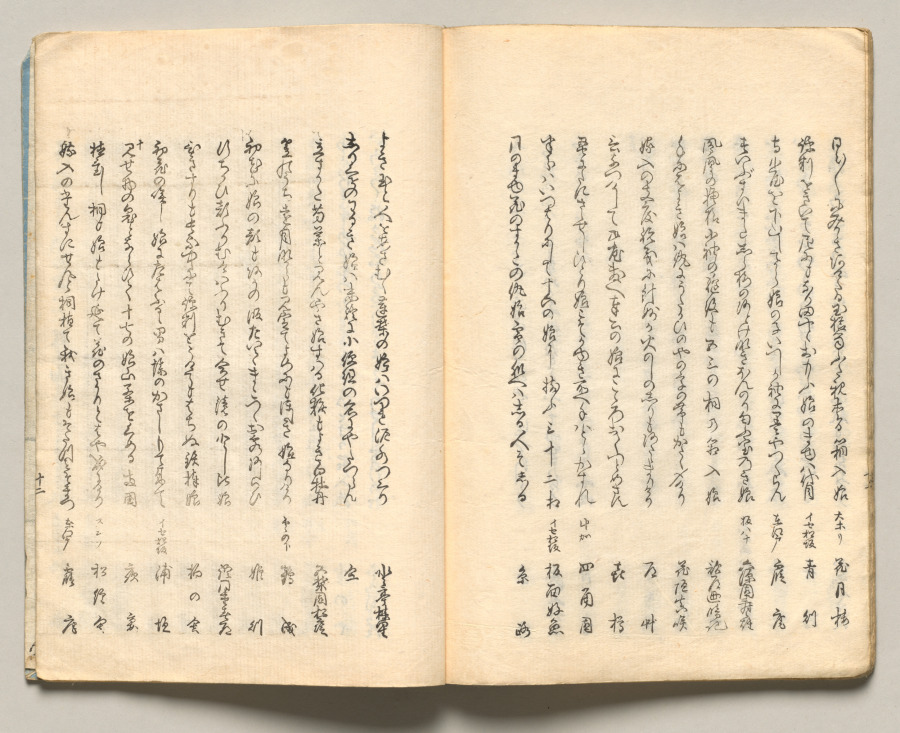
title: Spread Nineteen from Volume Six of People of Japan in Light Verse (Kyōka)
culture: Japan, Edo period (1615–1868)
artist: Utagawa Hiroshige (Japanese, 1797–1858)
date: 1857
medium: Woodblock-printed book; ink and color on paper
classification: Bound Volume